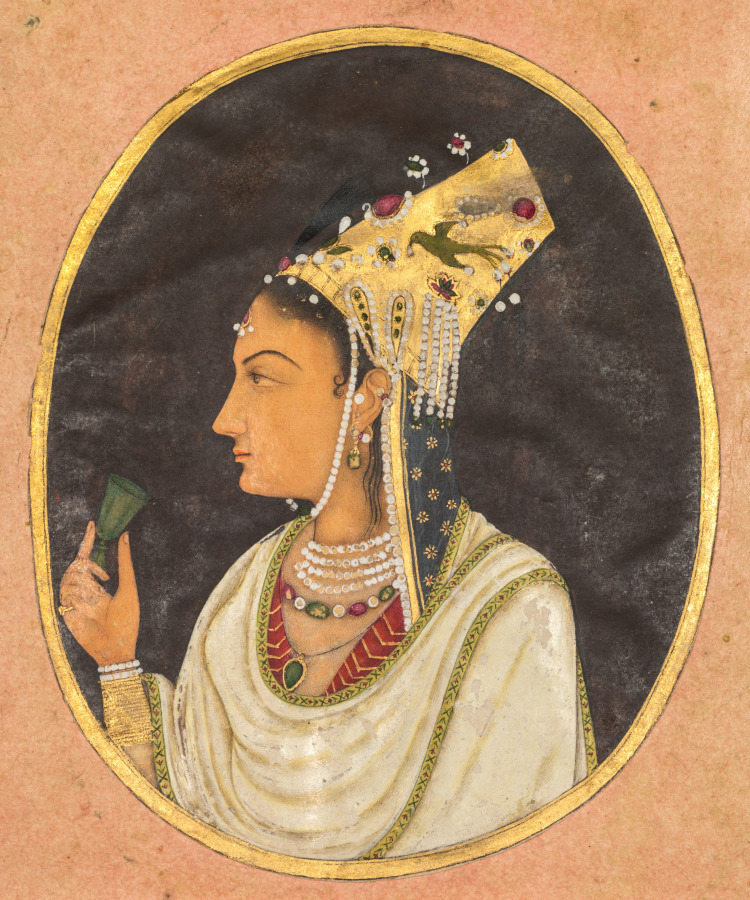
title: Oval portrait of a woman in a Chaghtai hat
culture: India, Mughal, 18th century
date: c. 1740–50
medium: Gum tempera and gold on paper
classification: Painting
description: The tall, flat-topped hat is an element of the native dress of the Mughals from eastern Uzbekistan. Of mixed Turkic and Mongol ethnicities, they spoke a Turkic language known as Chaghatai. Chaghatai refers to the name of the son of the Mongol Chingiz (Genghis) Khan, who ruled this area of Central Asia from 1246 to 1282. This woman’s hat has been studded with jewels and strings of pearls. The portrait jewel format that was once reserved for the emperor has now been expanded to include ladies of the court. The woman holds a jade wine cup and wears a draped upper garment with a woven or embroidered border similar to the fragment on display at the left.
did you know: She holds a delicate jade cup of the type for which the Mughals were famous.